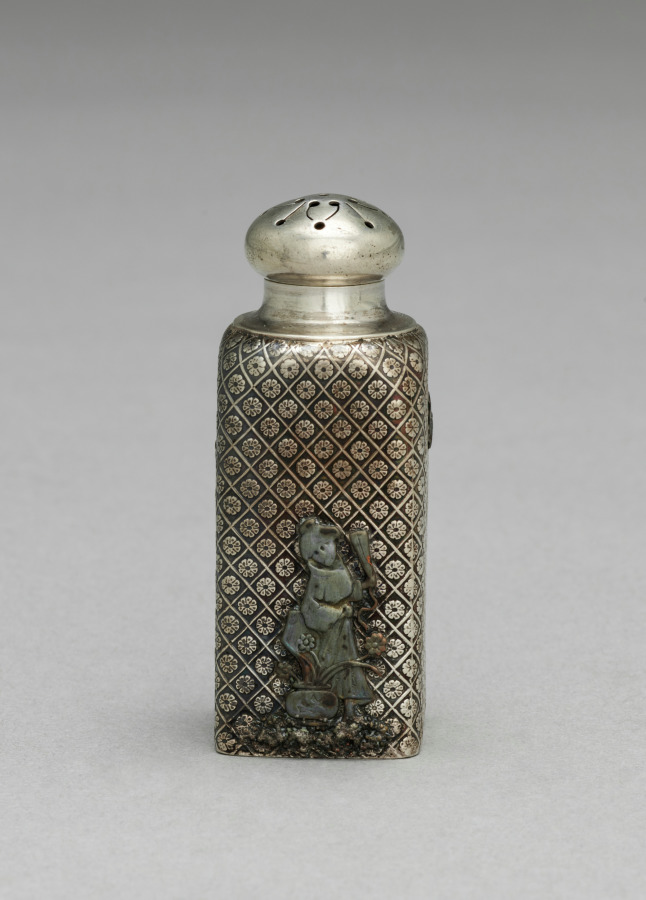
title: Pepper Shaker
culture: America, Rhode Island, Providence, 19th century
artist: Gorham Manufacturing Company (America, est. 1831)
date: c.1875–1885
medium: silver and mixed metals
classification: Silver